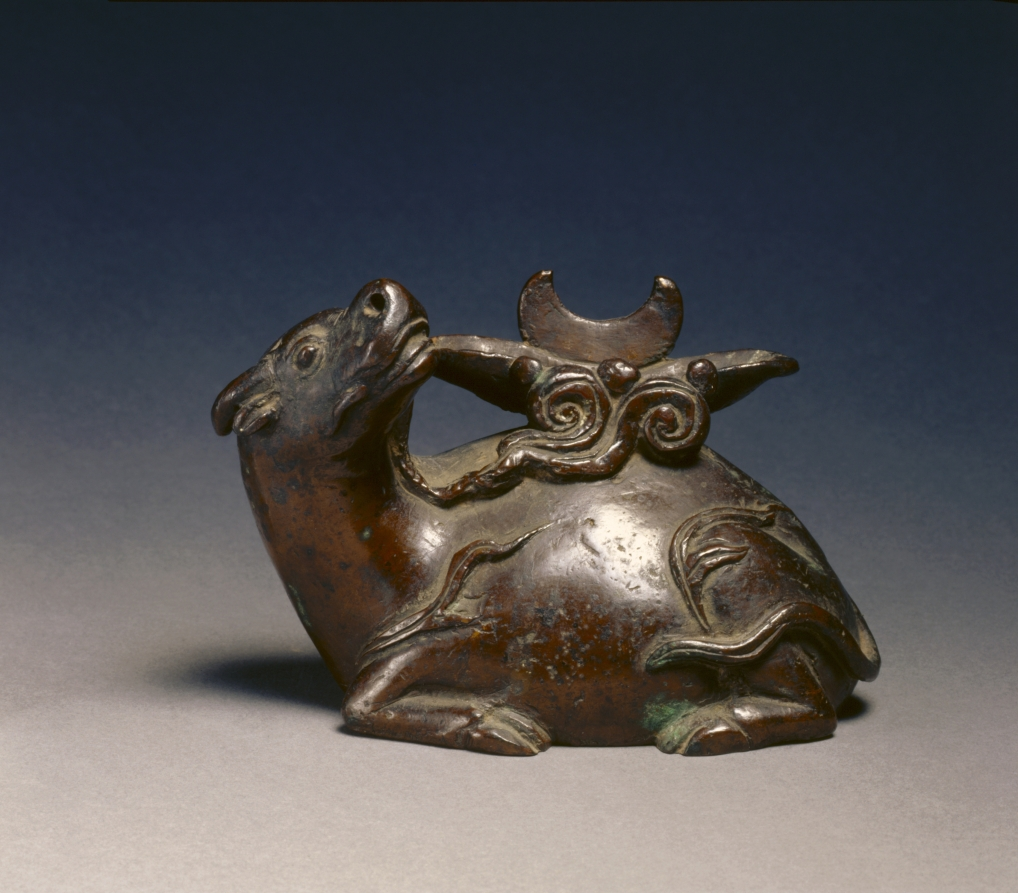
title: Mirror Stand in the Shape of an Ox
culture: China, Qing dynasty (1644-1911)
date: 1644–1911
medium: bronze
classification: Metalwork